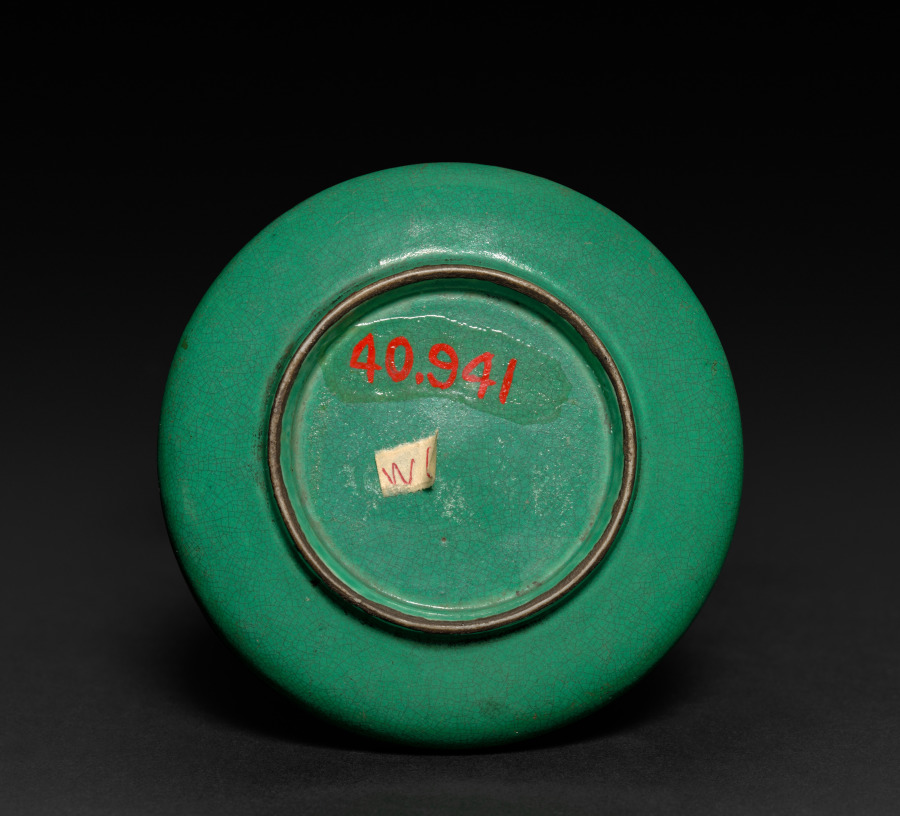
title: Flattened Globular Bowl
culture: China, Qing dynasty (1644-1911), Kangxi reign (1661-1722)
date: 1661–1722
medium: porcelain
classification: Ceramic